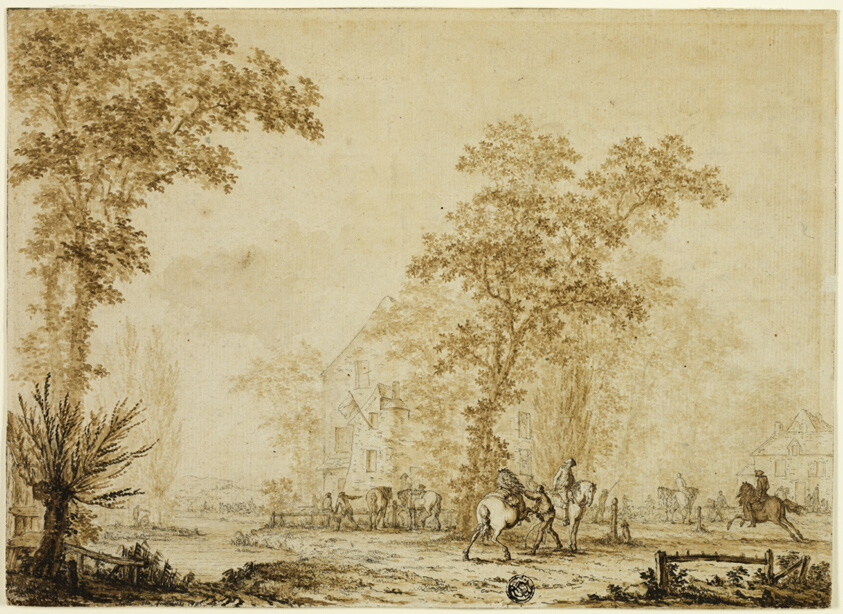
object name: Drawing and Watercolor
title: Soldiers Exercising Horses Near River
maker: Jacques Francois Joseph Swebach (French, 1769-1823); or Pieter Wouwerman (Dutch, 1623-1682)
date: 1785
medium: Pen and brown ink, with brush and brown wash, over traces of graphite, on tan laid paper, laid down on card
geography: France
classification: pen and ink drawings; drawings (visual works); prints and drawing